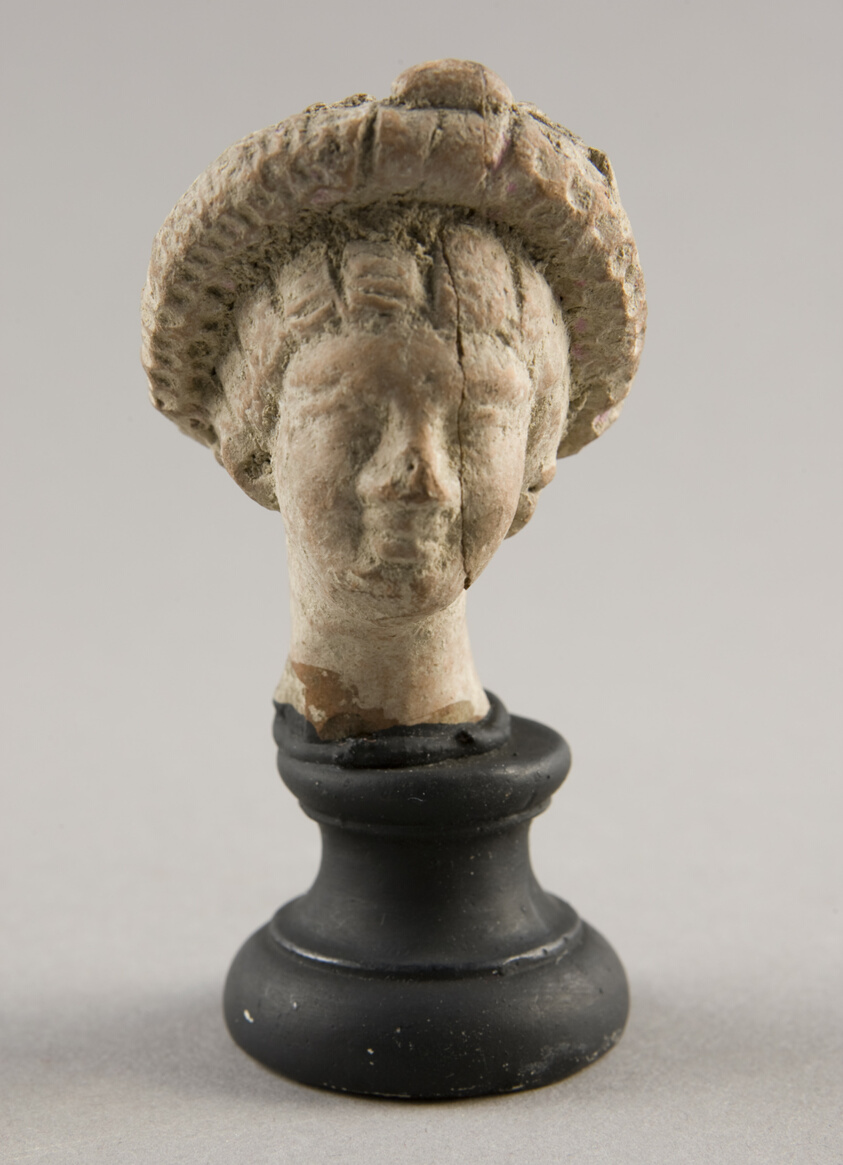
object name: Sculpture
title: Head of a Woman Wearing Wreath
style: greek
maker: Greek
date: 3rd-1st century BCE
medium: terracotta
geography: Greece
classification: earthenware; ceramics; sculpture; ancient art